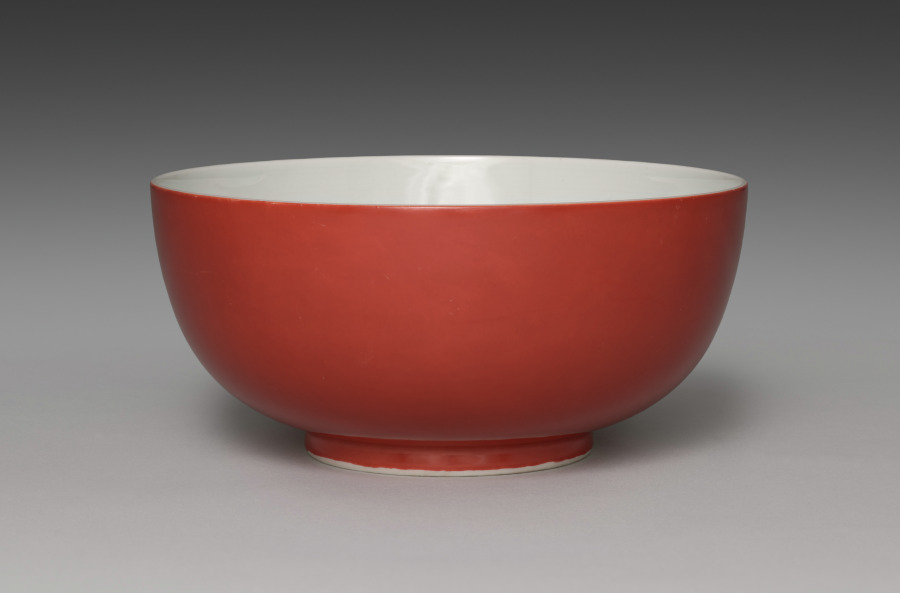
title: Sweets Bowl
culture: Japan, Taishō period (1912–26) or Shōwa period (1926–89)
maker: Seifū Yohei IV (Japanese, 1872–1951)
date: 1914–46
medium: Porcelain with coral red glaze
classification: Ceramic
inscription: 清風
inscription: 成山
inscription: 清風造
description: Like his father, Yohei IV also produced works with red monochrome glazes, like this red coral–glazed sweets bowl with white interior.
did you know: Seifū Yohei IV was active at home and abroad and won international recognition for his ceramic's glazes and designs.